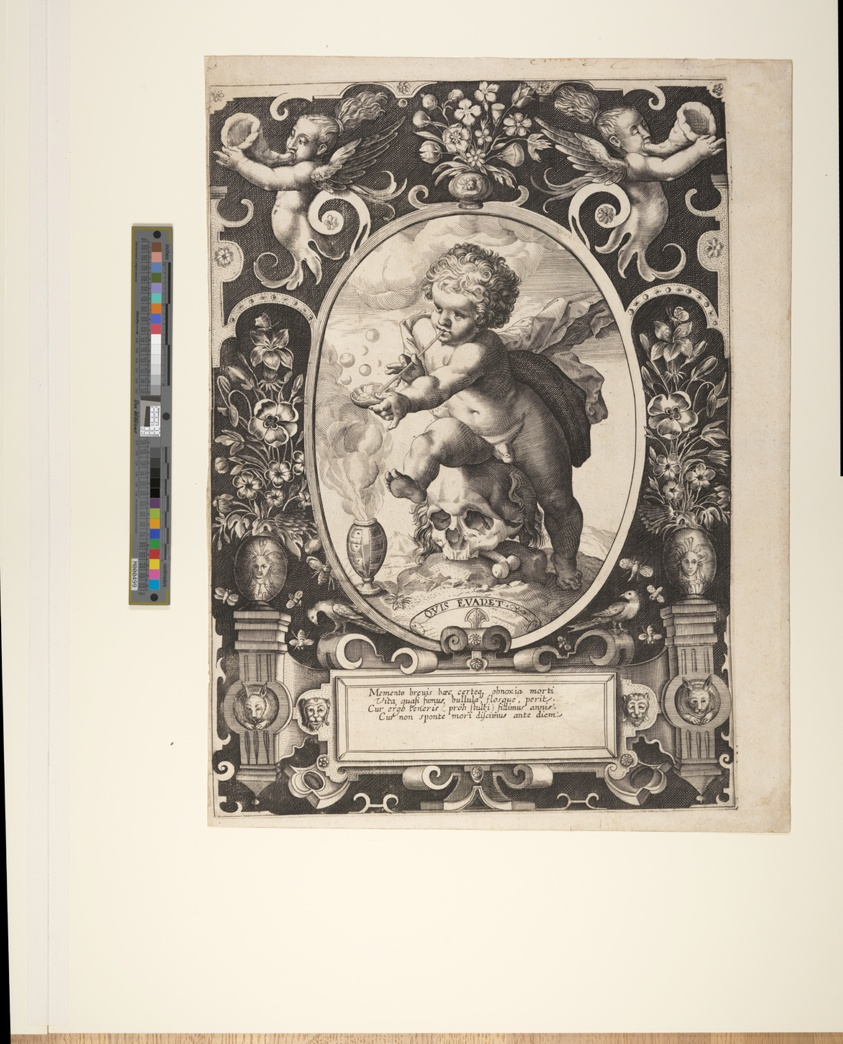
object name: Print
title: Allegory of Transience (Quis Evadet?)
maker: Workshop of Hendrick Goltzius; Dutch, 1558–1617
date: c. 1600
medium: Engraving on ivory laid paper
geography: Netherlands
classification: engraving; paper; print; prints and drawing